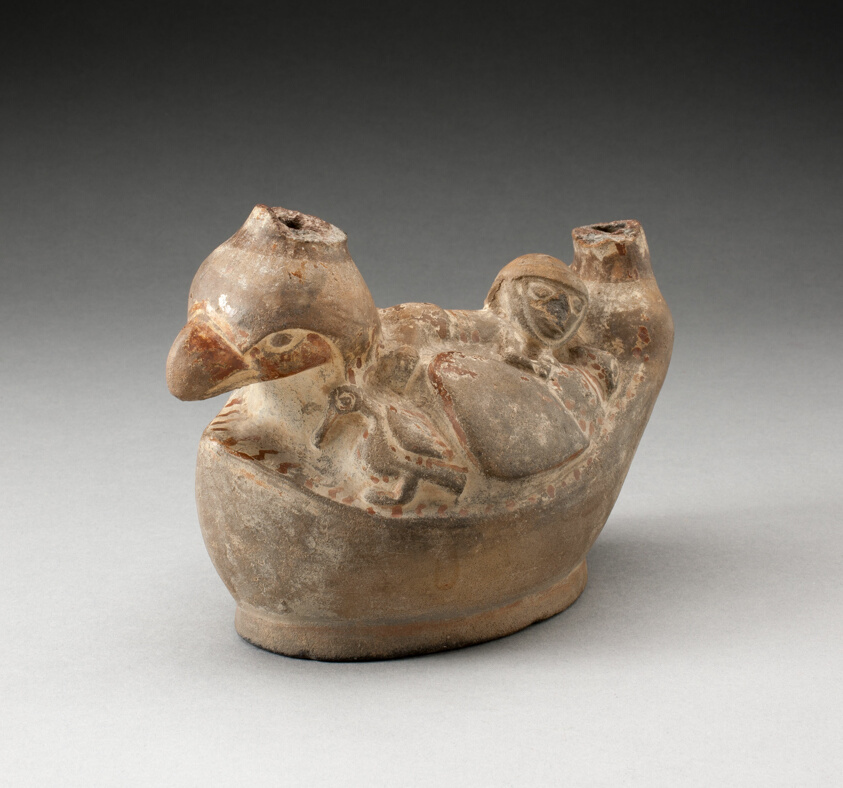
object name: Vessel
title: Stirrup Spout Vessel in Form of a Man Laying on a Bird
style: moche, mochica v, mochica, early intermediate period, Pre-Columbian, americas, Arts of the Americas, andean, andes, south american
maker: Moche (North coast, Peru)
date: 100 BCE–500 CE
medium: Ceramic and pigment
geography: Peruvian North Coast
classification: earthenware; art of the americas; ceramics; vessel